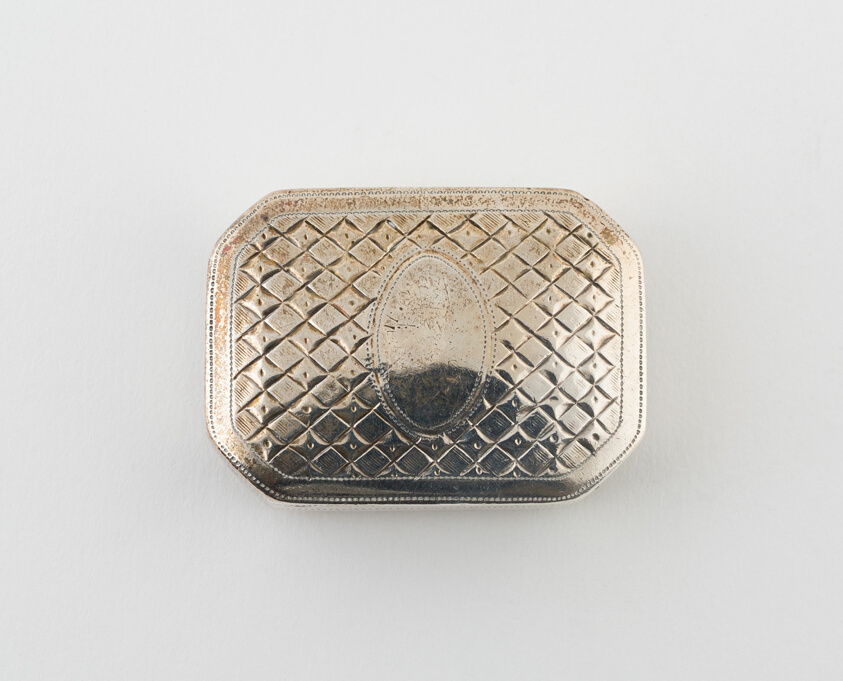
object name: Metalwork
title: Vinaigrette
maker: Samuel Pemberton (Birmingham, England)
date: c. 1802/03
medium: Silver and silver gilt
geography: Birmingham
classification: container for personal use; vinaigrette (container for health care); european decorative arts; metalwork; silver; decorative object/ornament